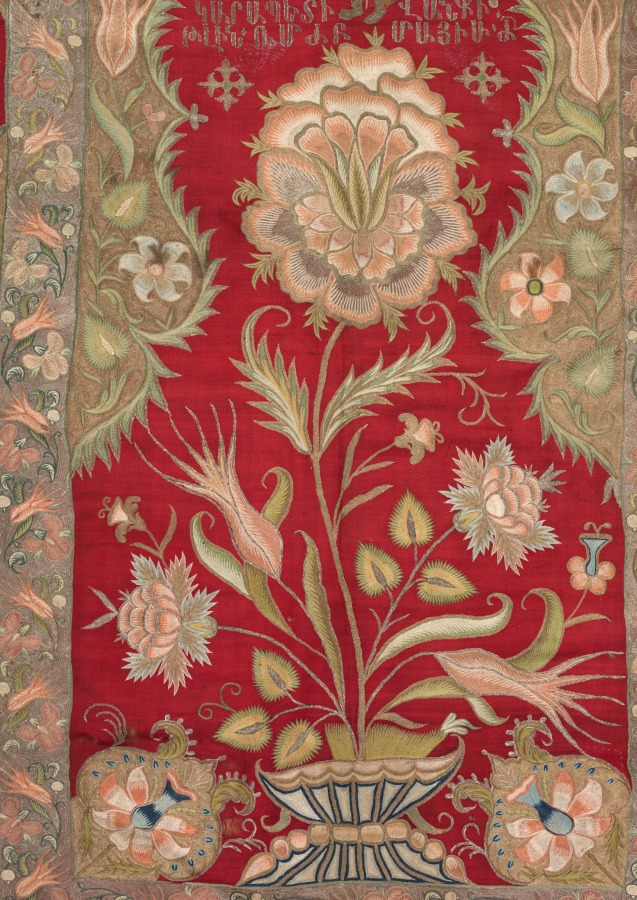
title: Embroidered Armenian liturgical curtain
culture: Turkey, Constantinople/Istanbul, Ottoman period (1299–1922)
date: 1763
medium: twill weave: wool; embroidery, chain stitch: silk, gilt- and silver-metal thread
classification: Textile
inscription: Inscription embroidered in erkatagir script with metal thread reads: "This curtain (varakouyr) is in memory of the people of Hassan Pasha Khan who gave it to the Monastery (vank) of Saint John the Baptist (Surp Garabed) on the Armenian date 10 May 1212 (1763 AD)."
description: This rare Ottoman embroidery features a floral bouquet that enriches the field under an elegant arch of gilt-metal thread. Flanked by vines of tulips and irises on a silver-metal-thread ground, vases of tulips and jonquils within cartouches adorn the main border and the well-turned corners, a sign of high quality. Dated 1763, the textile documents a mid-18th-century style and technique uncommon in Ottoman embroideries. The Armenian community commissioned this pattern for a liturgical curtain. Beneath the arch, Saint John the Baptist appears with a staff of victory, holding his own severed head in one arm and the Lamb of God in the other. The embroidered Armenian inscription reads: "This curtain is in memory of the people of Hassan Pasha Khan who gave it to the Monastery of Saint John the Baptist on the Armenian date 10 May 1212 [1763]."